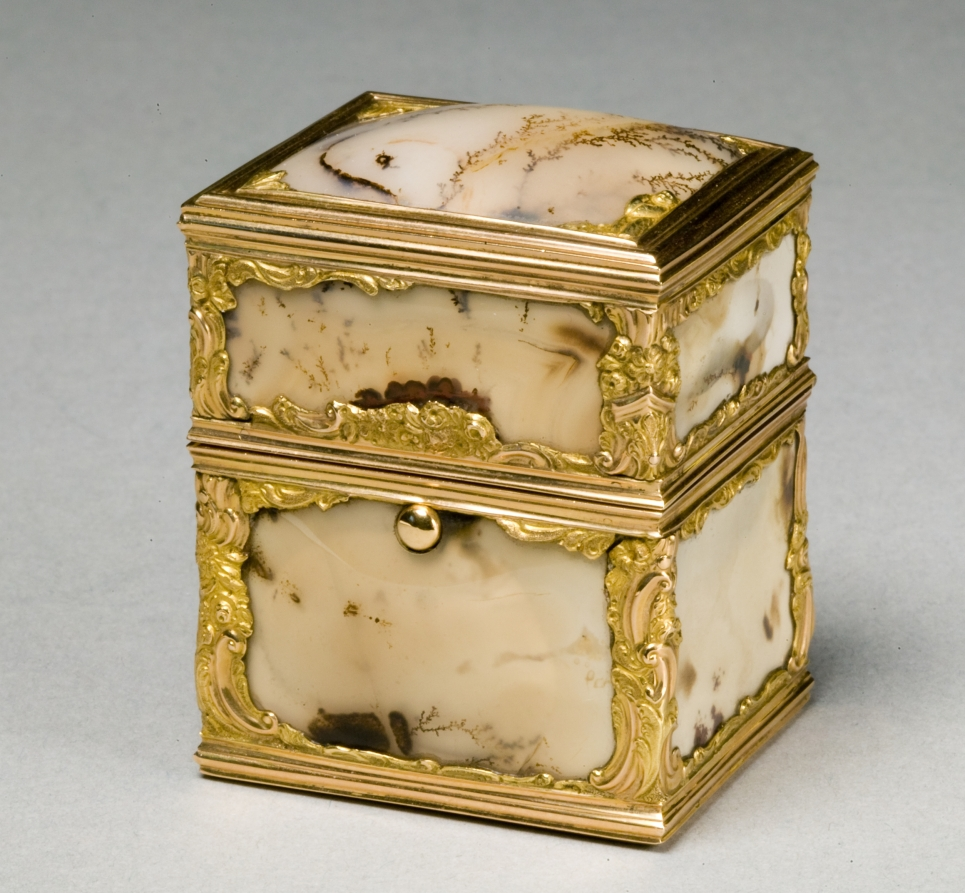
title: Vanity Case (Nécessaire)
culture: England, mid 18th century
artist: manner of James Barbot (British)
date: c. 1760–65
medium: gold, agate, interior fitted with implements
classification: Miscellaneous